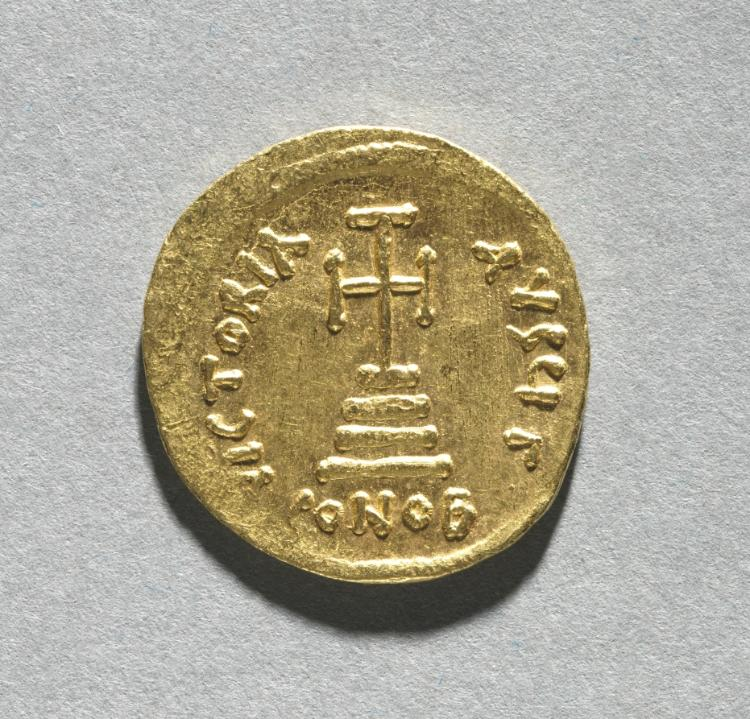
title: Solidus with Heraclius and his Son Heraclius Constantine (reverse)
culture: Byzantium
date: c. 616–625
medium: gold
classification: Coins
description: Byzantine Gold Coins The vast number of surviving Byzantine coins attests to the level of trade across the empire. Controlled and supervised by the emperor, the producers of coins took care to represent his authority and reflect his stature. Talented artists were recruited to engrave the dies (molds) used for the striking of coins. Emperors increasingly came to include their heirs and co-emperors on their coinage, as well as other family members or even earlier rulers. Coins were recognized, then as now, as small, portable works of art. With their inscriptions and images, Byzantine coins provide valuable documentation of historical events and a record of the physical appearance of the emperors. The solidus is the basic gold coin of 24 karats; the tremissis, a gold coin of one-third the weight and value of the solidus; and the nomisma, which in the 10th century replaced the solidus as the standard gold coin.